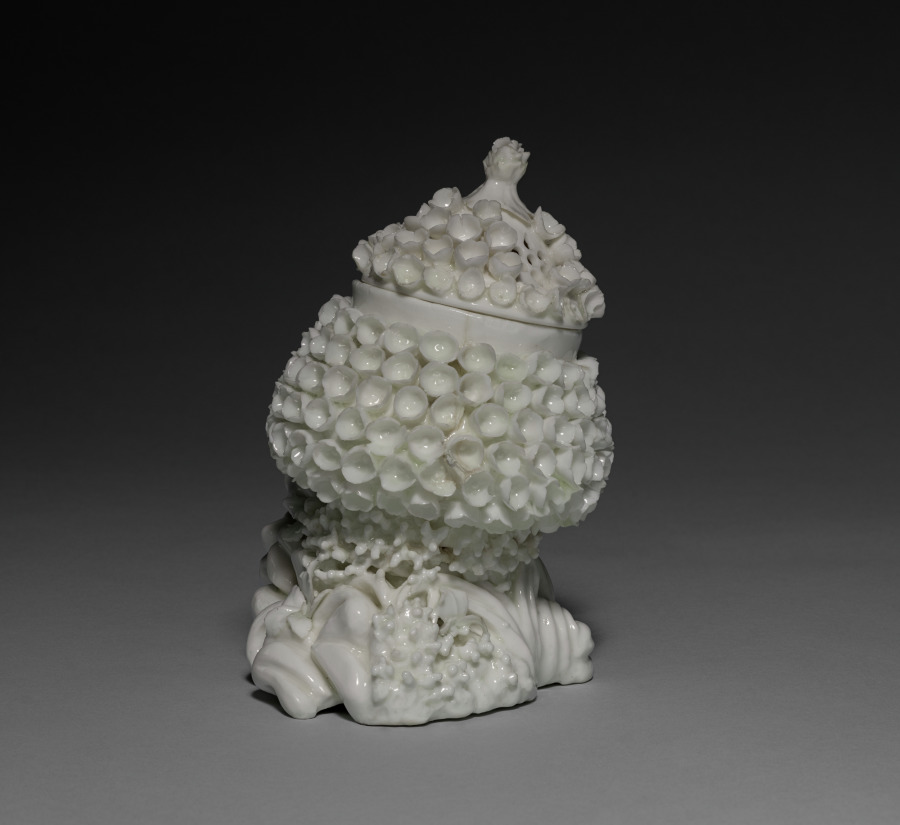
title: Potpourri Vase with Cover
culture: France, Vincennes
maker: Mennecy Factory (French)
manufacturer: Vincennes Porcelain Factory (France, 1740–56)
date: c. 1750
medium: soft-paste porcelain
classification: Ceramic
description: The delicate flowers that cover the lid and base of this vase draw inspiration from the schneeballblüten, or guelder rose, pattern produced at the German Meissen porcelain factory. The flowers on the lid are spaced by small, unobtrusive perforations that allow the scent of the potpourri, a mixture of flowers, herbs, and spices placed inside this vase, to disperse.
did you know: This style of potpourri vase, a pot atop a rockwork base, was popularly produced by major 18th-century porcelain factories including those at Vincennes, Chantilly, and Saint-Cloud.